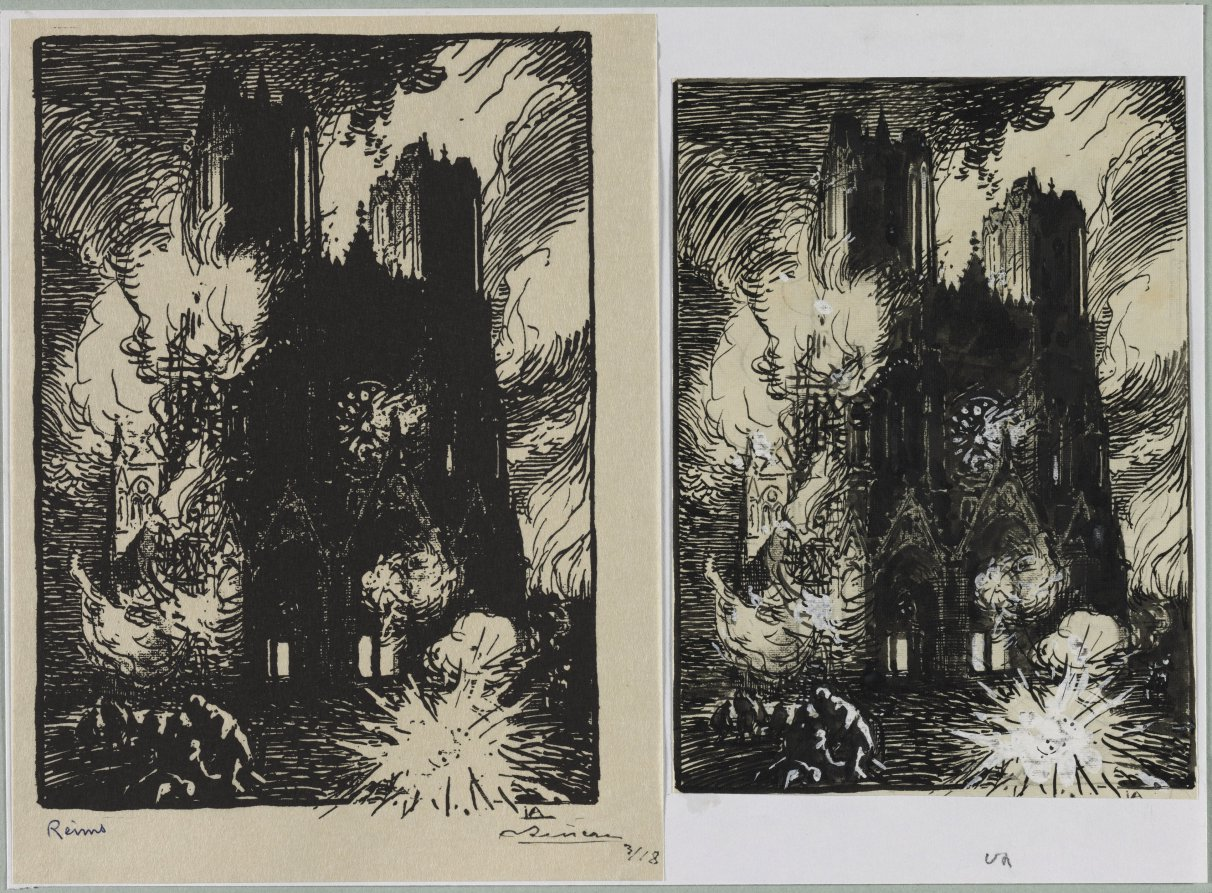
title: Reims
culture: France, 20th century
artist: Auguste Louis Lepère (French, 1849–1918)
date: 1914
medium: pen and brush and black ink with traces of black crayon heightened with white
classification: Drawing